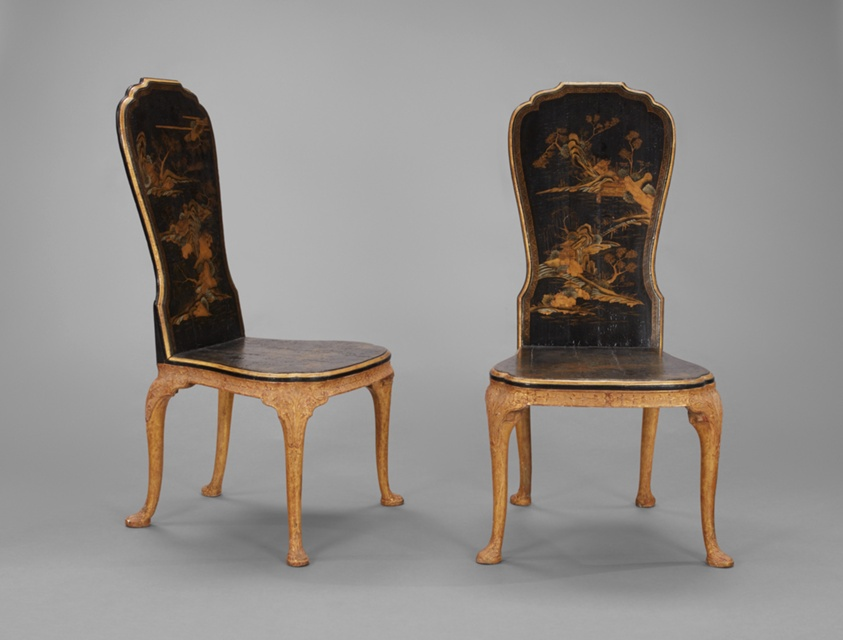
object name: Furniture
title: Pair of Hall Chairs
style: Baroque, chinoiserie, georgian, 18th Century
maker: China (lacquer back and seat panels) and England (frame)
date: 1720-30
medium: Frames: gilt gesso on beechwood; Backs and seats: lacquered and gilt Chinese softwood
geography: England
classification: chair; furniture; seating; european decorative arts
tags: landscapes, rocks